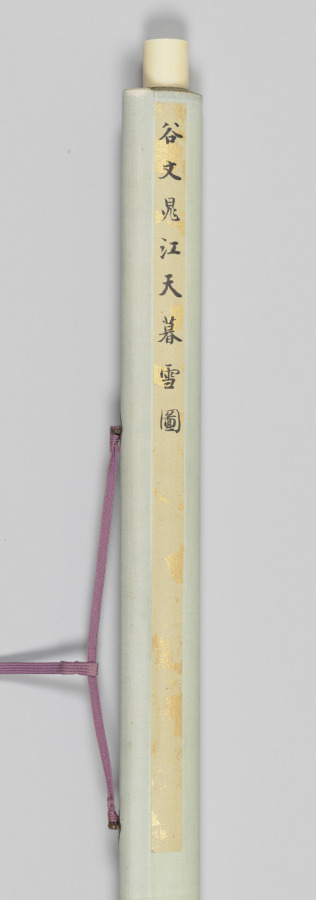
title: Evening Snow Blending River and Sky, from Eight Views of Xiao-Xiang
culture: Japan, Edo period (1615–1868)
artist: Tani Bunchō (Japanese, 1763–1841)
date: 1788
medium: album leaf remounted as a hanging scroll; ink and color on paper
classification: Painting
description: This painting was part of a set of album leaves representing the Eight Views of Xiao-Xiang, a theme originating in Chinese poetry and painting that spread to both Korea and Japan. Southern China’s Xiao-Xiang area, where the mist-covered banks of the Xiang River created a complex landscape shifting like the moods and minds of people, captured the imaginations of generations of painters and calligraphers. Inscriptions on these works suggest that they were possibly ordered by newly prominent Japanese Confucian scholars.